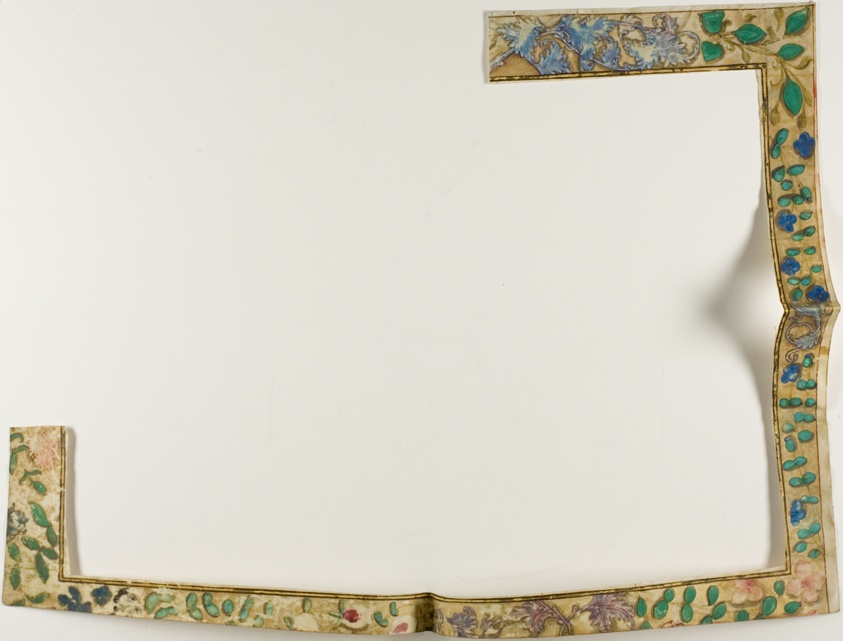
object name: Drawing and Watercolor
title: Illuminated Border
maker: European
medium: Manuscript cutting in tempera, colored inks and gold leaf on vellum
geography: Europe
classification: tempera; drawings (visual works); prints and drawing